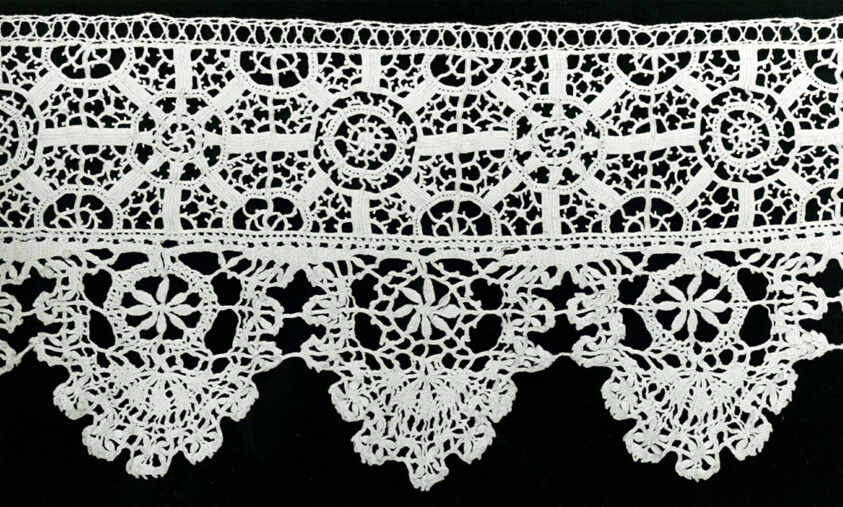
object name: Textile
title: Border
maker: Italy, points probably Genoa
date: 1601/25 (needlelace); 1625/50 (points)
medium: Linen, needle lace worked on a laid and plaited thread ground, Reticello pattern; edged with bobbin straight lace points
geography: Italy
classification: textile; lace - mixed